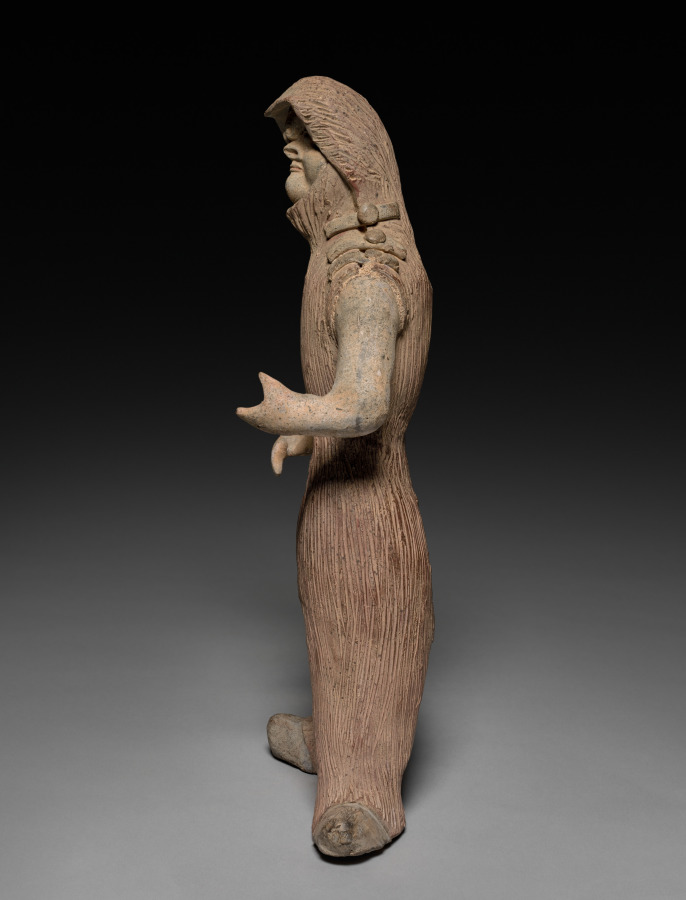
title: Figure of a Warrior in Leather Armor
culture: China, Modern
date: 20th Century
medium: buff earthenware with traces of polychromy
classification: Sculpture